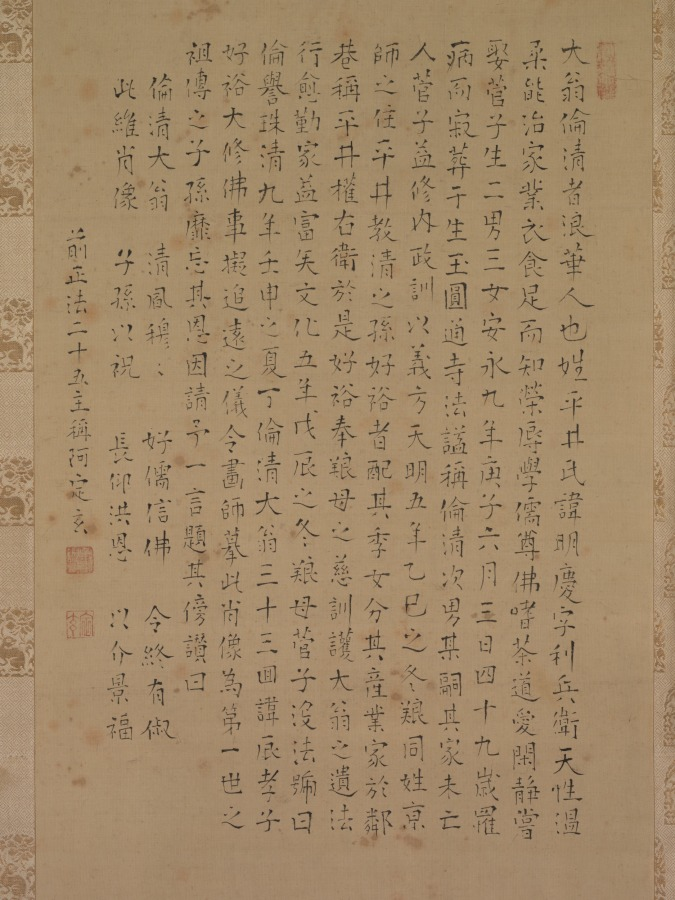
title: Portrait of Samurai-Official: Hirai Rinsei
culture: Japan, Edo period (1615–1868)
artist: attributed to Tsukioka Settei (Japanese, 1710–1786)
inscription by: Jogen (Japanese)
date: 1776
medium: hanging scroll; ink and color on silk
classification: Painting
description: In this pair of figure paintings, the artist provided generational portraits of two clan leaders from the Hirai family, accompanied by lengthy inscriptions in a distinctive calligraphic style from separate scholar-officials.